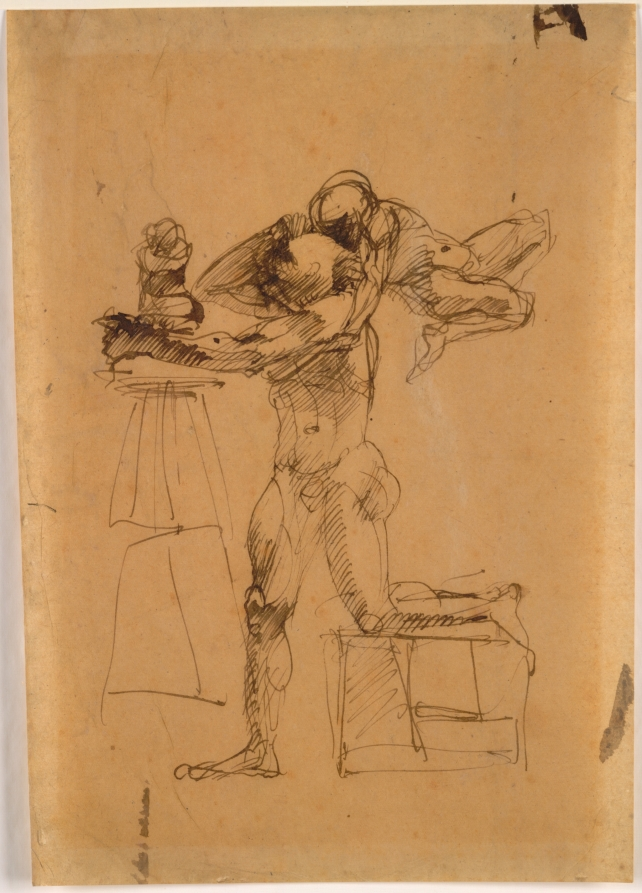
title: The Genius of the Sculptor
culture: France, 19th century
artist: Auguste Rodin (French, 1840–1917)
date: c. 1880–83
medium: pen and brown ink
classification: Drawing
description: Auguste Rodin repeatedly explored the theme of creative male genius in major works, such as the famous Thinker, a cast of which sits outside the Cleveland Museum of Art on the south terrace. In this drawing, Rodin depicted the artist in active thought with his hand on his head, accompanied by a wingless “genius” floating above him. He derived this symbol of inner creative energy from the traditional subject of the winged muse, examples of which also appear on Michelangelo’s Sistine Chapel ceiling as companions to God the Father.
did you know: In other similar depictions of the theme seen in this drawing, Auguste Rodin depicted Genius as a woman.